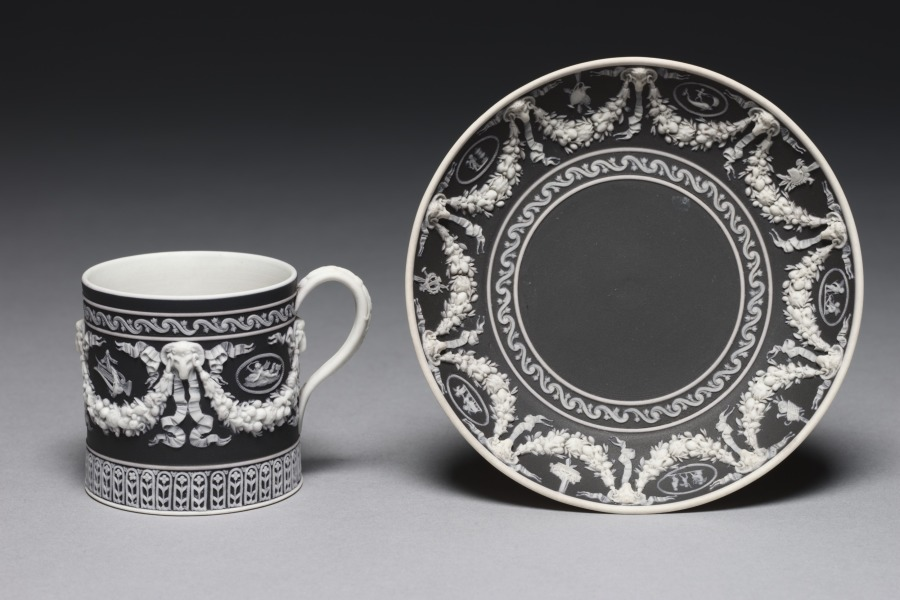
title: Cup and Saucer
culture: England, Staffordshire, 18th century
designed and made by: Wedgwood Factory (British)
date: c. 1790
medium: jasper ware with relief decoration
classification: Ceramic